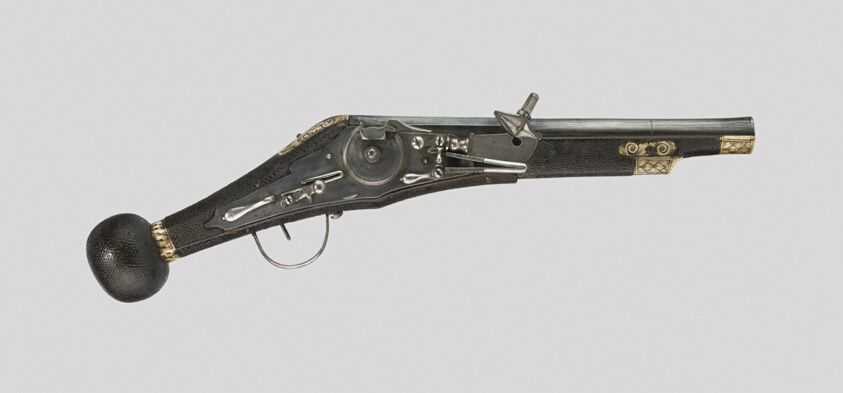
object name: Arms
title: Wheellock Puffer (Pistol) for the Mounted Bodyguard of the Elector of Saxony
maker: Abraham Dressler ((German active 1572—1590), Dresden)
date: 1589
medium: Steel, cherrywood, and staghorn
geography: East Germany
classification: firearm-handgun; arms; arms and armor